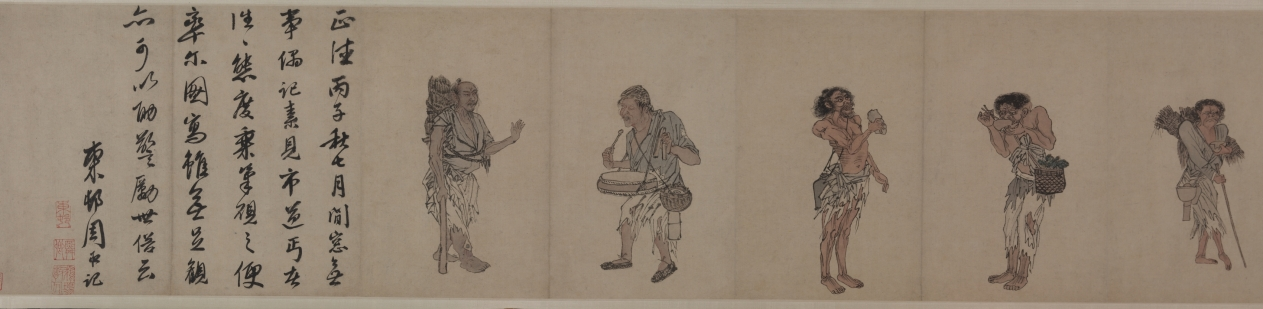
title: Beggars and Street Characters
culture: China, Ming dynasty (1368–1644)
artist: Zhou Chen (Chinese, c. 1450–c. 1536)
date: 1516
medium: Handscroll; ink and light color on paper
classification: Painting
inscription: 題: 周臣流氓圖. 古堇趙鶴琴 [印] 老鶴臨池; 鵝池軒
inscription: 正德丙子秋七月，閒窗無事 ，偶記素見市道丐者種種態度。乘筆硯之便，率爾圖寫。雖無足觀，亦可以助警勵世俗云。 東邨周臣記 [印]東邨; 舜卿; 鵝場散人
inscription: 吳中東邨周君，善丹青，尤長於人物。此圖其所見盛市丐者之狀種種，各盡其態，觀者絕倒。嗟乎，今之晝夜乞哀以求富貴者，安得起周君而貌之耶。臥雲徵君出示，余漫題其後。 甲子歲十月吳門黃姬水 [印] 士雅山人; 另一印不詳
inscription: 是冊凡數種。其飢寒流離疲癃殘疾之狀，種種之異。觀此而不惻然心傷者，非仁人也。計正德丙子逆瑾之流毒已數年。而[江]彬 [錢] 寧輩肆虐方熾。意分符剖竹諸君，亦鮮有能撫字其民者。然則舜卿此作，殆與鄭君 流民圖同意。其有補於治道者不淺，要不可以墨戲忽之也。 長洲張風翼題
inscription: 東村此筆，蓋圖寫飢寒乞丐之態，以警世俗耳。而質山 [黃姬水]欲其寫昏夜乞哀，而靈墟[張鳳翼]則擬之於安上門圖。二君之見，其各有所指哉。昔唐六如每見周筆，輒稱曰：周先生！蓋深服其神妙之不可及。若此冊者，信非他人可能而有符於六如之心伏矣。豈易得耶。若黃、張之指，則又論於畫之外，不在於形似筆墨之旨也。 萬歷丁丑十二月三日 茂苑文嘉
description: Zhou Chen from Suzhou provides rare depictions of impoverished people that once filled the city’s markets and streets. Despite Suzhou’s prosperity, its rapid growth polarized society, including the wealthy and those who had deserted their farmlands, who were without homes, unemployed, or sick. Amid these are figures who inspire fear rather than empathy. The painting may thus be informed by local practices at the end of the lunar year, in which street beggars, in exchange for food or money, would dress up like ghosts and demons to drive out evil forces.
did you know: Although Zhou Chen's original composition was an album of 24 figures, today it is mounted as two handscrolls, one in the Cleveland collection and one in the Honolulu Museum of Art.